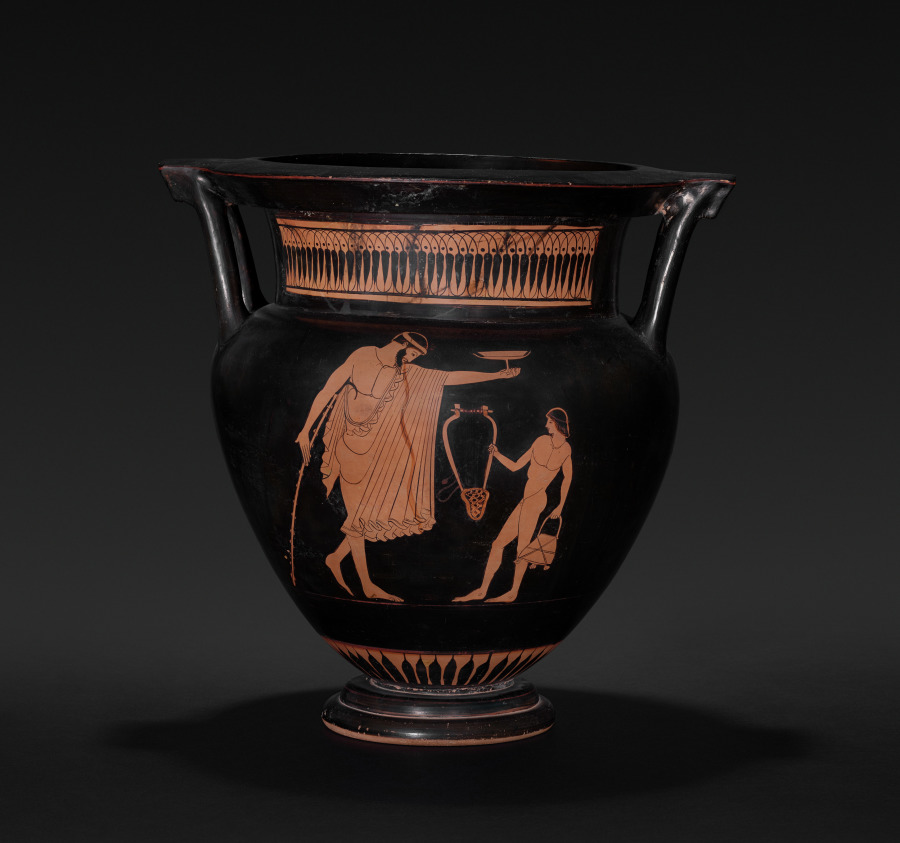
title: Red-Figure Column Krater (Mixing Vessel): Komos (Revel)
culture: Greek, Attic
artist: attributed to Pig Painter (Greek, Attic, active c. 480–460 BCE)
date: 470–460 BCE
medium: ceramic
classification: Ceramic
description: Used for mixing wine and water at a symposium (or drinking party), this column-krater speaks to the perils and pleasures of drinking. On one side, a bearded man holding a staff and a drinking cup leans forward, a red stream of vomit falling from his mouth. Before him is a nude young boy, holding a tortoiseshell lyre and a basket or pail. On the other side, a young man dances, holding a deep cup and wearing just one boot. On the neck above him, scratched in large letters, is the name SIMONOS, probably indicating that the vase once belonged to someone named Simon.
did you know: The bearded man on this vase is vomiting—perhaps a humorous warning against over imbibing.